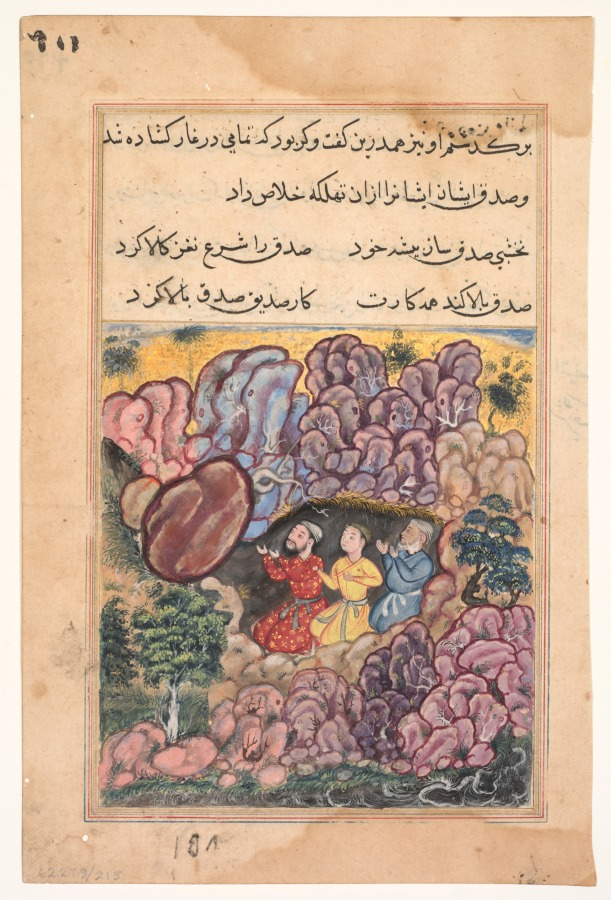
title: The tale of the three men trapped in a cave by a rolling boulder, from a Tuti-nama (Tales of a Parrot): Thirty-second Night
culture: Mughal India, court of Akbar (reigned 1556–1605)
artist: attributed to Bihzad (Persian, active in India mid-1500s)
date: c. 1560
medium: gum tempera, ink, and gold on paper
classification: Painting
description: Three men kneel in the bowels of a dark cave where they have been trapped while seeking hidden treasure. Fearful and desperate, they suddenly hear a disembodied voice that orders them to confess their transgressions. As each man speaks, a portion of the boulder disappears, and they are ultimately freed.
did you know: This painting is attributed to Bihzad, the son of Abd al-Samad the Persian master of the Mughal court.